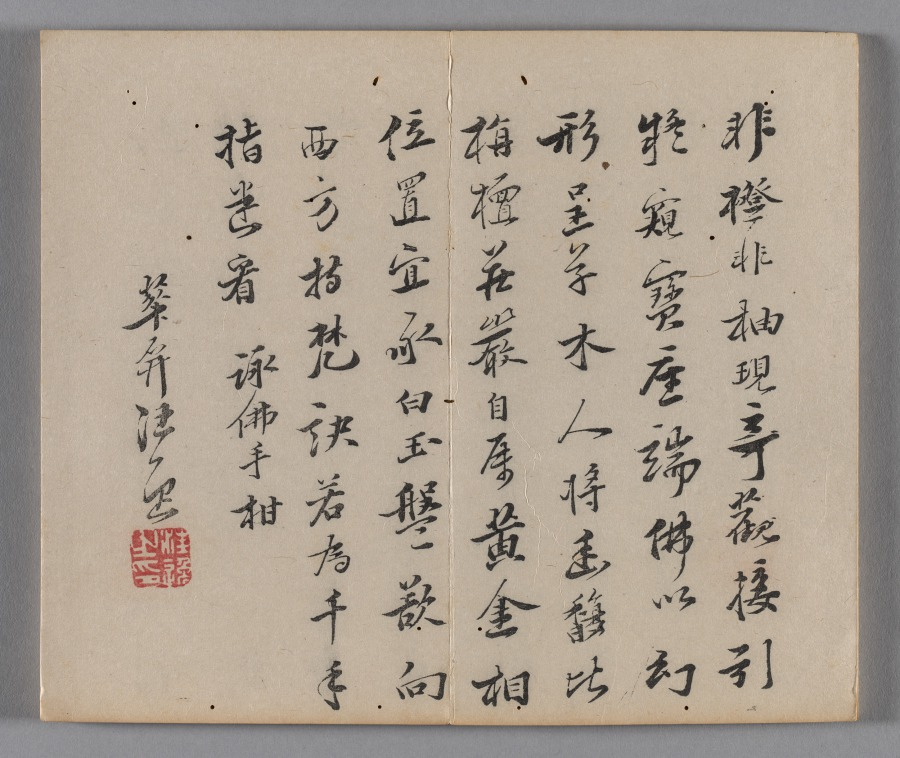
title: Ten Bamboo Studio Painting and Calligraphy Handbook (Shizhuzhai shuhua pu): Fruit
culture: China, Qing dynasty (1644-1911)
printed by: Hu Zhengyan (Chinese, c. 1584–1674)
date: 1633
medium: Woodblock-printed book; ink and colors on paper; first edition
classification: Print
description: Color printing reached a level of perfection in the early 1600s, as seen in this Ten Bamboo Studio Collection of Calligraphy and Painting and the Mustard Seed Garden Manual of Painting (printed 1679 and 1701). The painterly quality, precision in registering (aligning) the woodblocks, and harmonious colors made them the most successful color print editions in Chinese history. Both editions were printed and compiled in Nanjing, spread nationwide, and had a great impact on the arts in Japan and Korea.